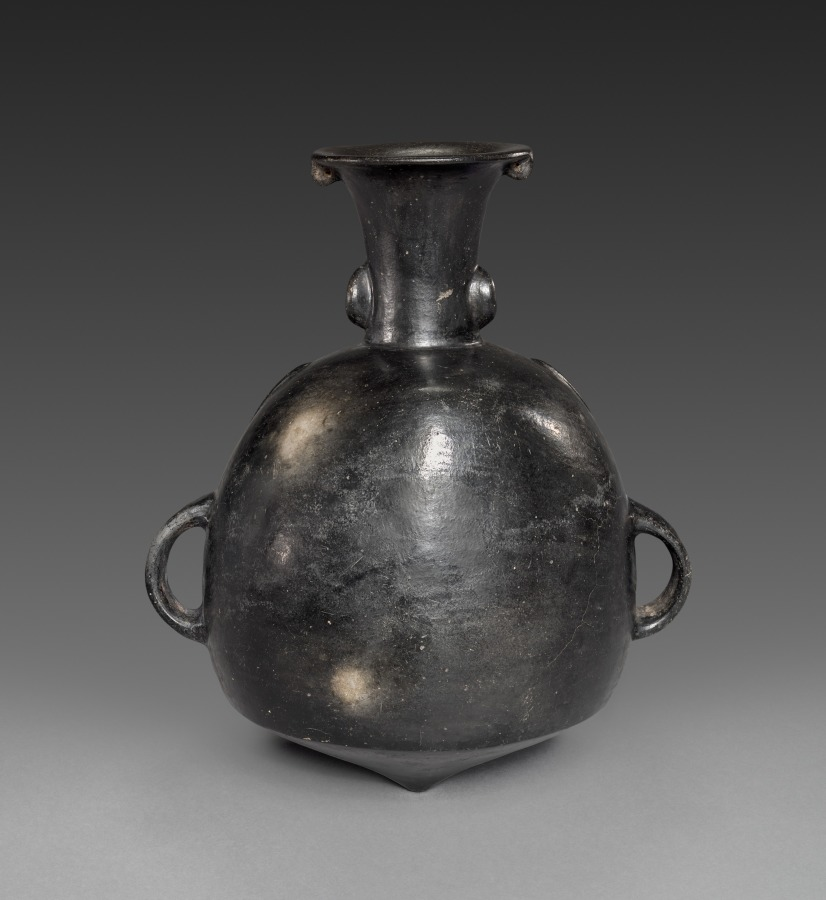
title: Hunchback Vessel (Aryballos)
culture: Central Andes (Peru), Chimú-Inka style, Late Horizon period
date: 1470–1521 (Thermoluminescence date, 1315–1615)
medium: ceramic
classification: Ceramic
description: This handsome vessel, along with the nearby double-chambered vessel, were made on the north coast after the Inka conquered the Chimú in the 1460s. Under Inka rule, many aspects of Chimú ceramic technology continued but new forms and subjects were introduced, such as the aryballos, a classic Inka vessel type. This example takes the form of a hunchback and may refer to the Inka predilection for employing hunchbacks as royal servants.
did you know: Hunchbacks seem to have functioned as servants in Inka royal palaces.